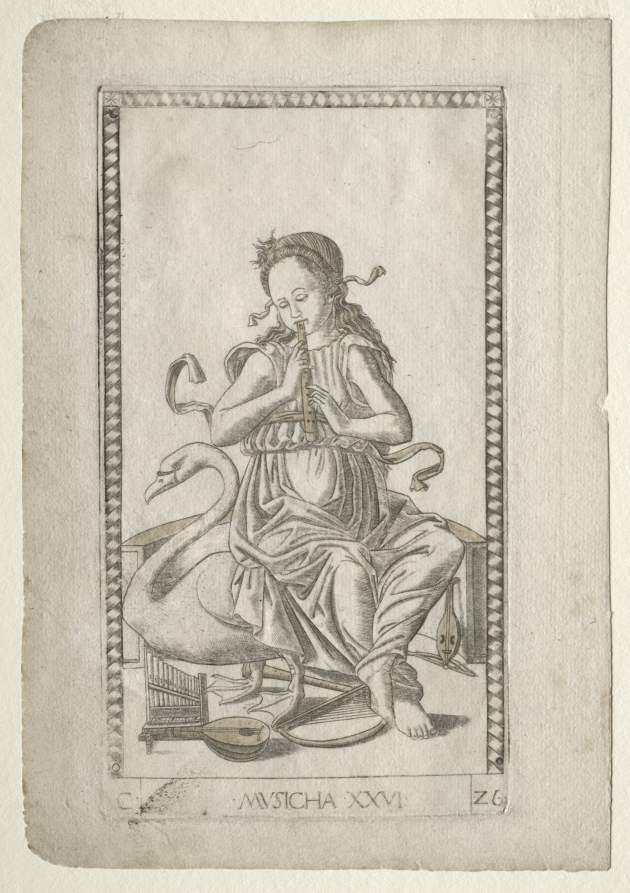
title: Music (from the Tarocchi, series C: Liberal Arts, #26)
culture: Italy, Ferrara, 15th century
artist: Master of the E-Series Tarocchi (Italian, active 1460s)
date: before 1467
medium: engraving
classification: Print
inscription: Lettered below the image of Musicha (Music): C· / ·MUSICHA·XXVI· / ·26·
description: This engraving is part of the group “C” named Liberal Arts. Conceptually, the liberal arts descended from classical antiquity, and were divided into the Trivium (Grammar, Rhetoric, and Dialectic or Logic) and the Quadrivium (Music, Geometry, Arithmetic, and Astronomy). In the Tarocchi set the total number was risen to ten, with the addition of the three disciplines (Poetry, Philosophy, and Theology). The liberal arts denoted knowledge or skills considered necessary to participate in a free society. By the late Middle Ages, they began to be represented in the visual arts as womanlike allegories. Here, Musicha (Music) is personified as a young female figure seated upon a swan and playing a recorder, known simply as a flute in the 15th century. At her feet are numerous musical instruments including a portative organ, lute, shawm, harp, and rebec. The swan can be interpreted as a symbol of song, based upon the ancient belief that this bird, which is mute all its life, sings in exquisite tones shortly before it dies.